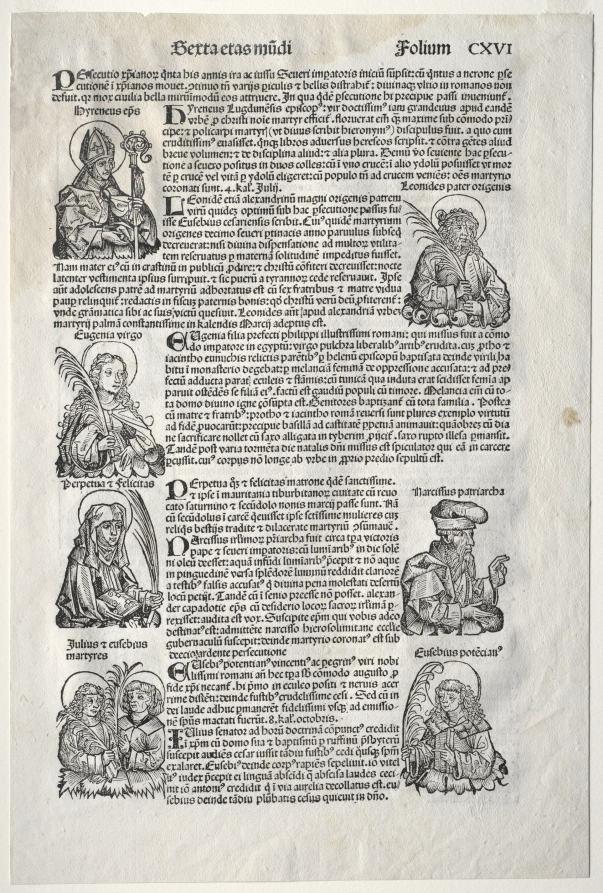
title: Nuremberg Chronicle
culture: Germany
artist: Michael Wolgemut (German, 1434–1519)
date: 1493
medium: woodcut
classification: Print